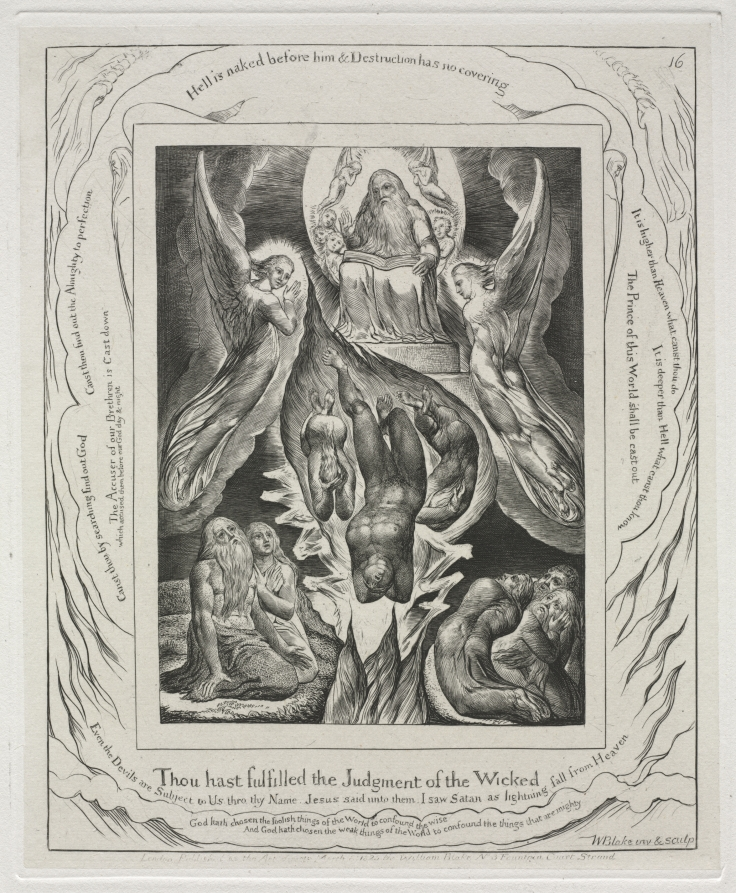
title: The Book of Job: Pl. 16, Thou hast fulfilled the judgment of the wicked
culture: England, 19th century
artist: William Blake (British, 1757–1827)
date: 1825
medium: engraving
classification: Print